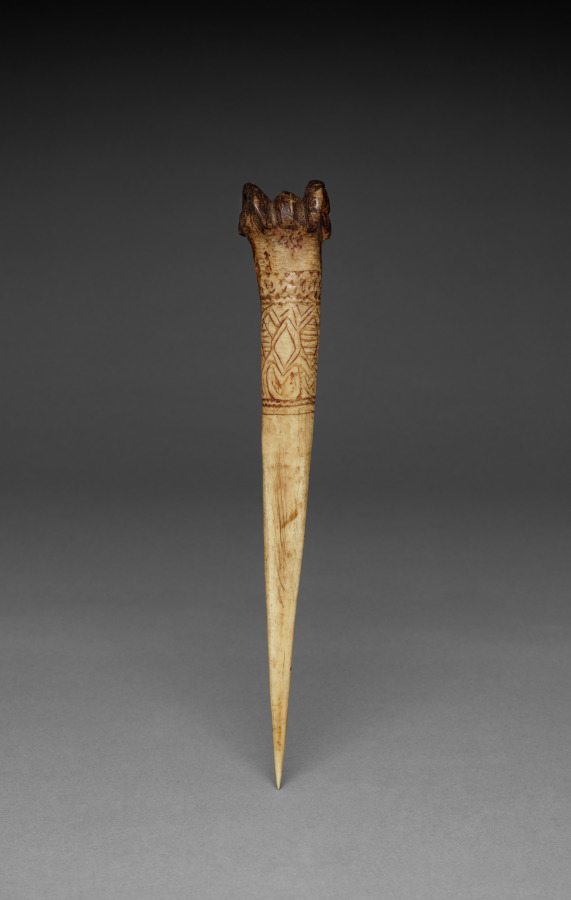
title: Dagger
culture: New Guinea, Sepik River Region, 20th century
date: 1900s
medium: cassowary bone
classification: Arms and Armor